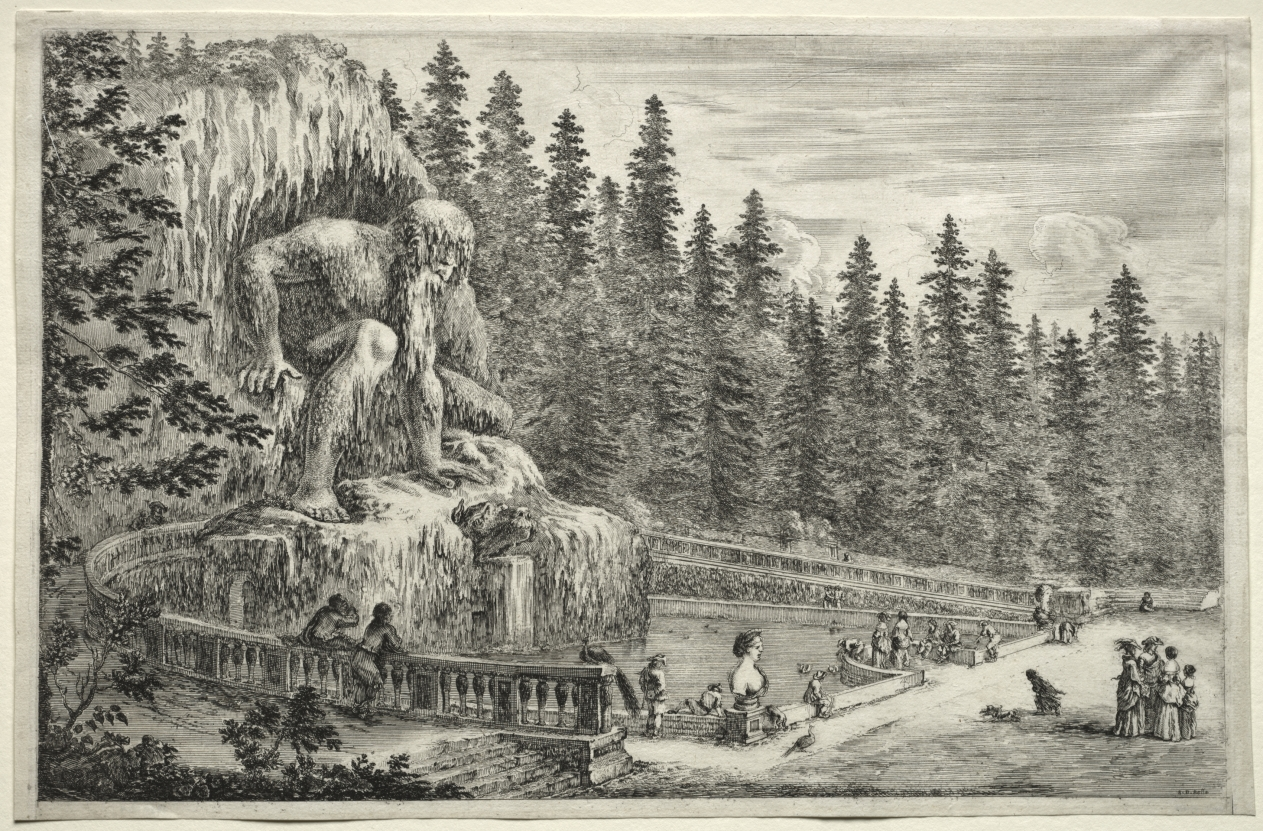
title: Views of the Villa of Pratolino: Colossal Statue of the Apennines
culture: Italy, 17th century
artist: Stefano Della Bella (Italian, 1610–1664)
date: c. 1653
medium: etching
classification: Print